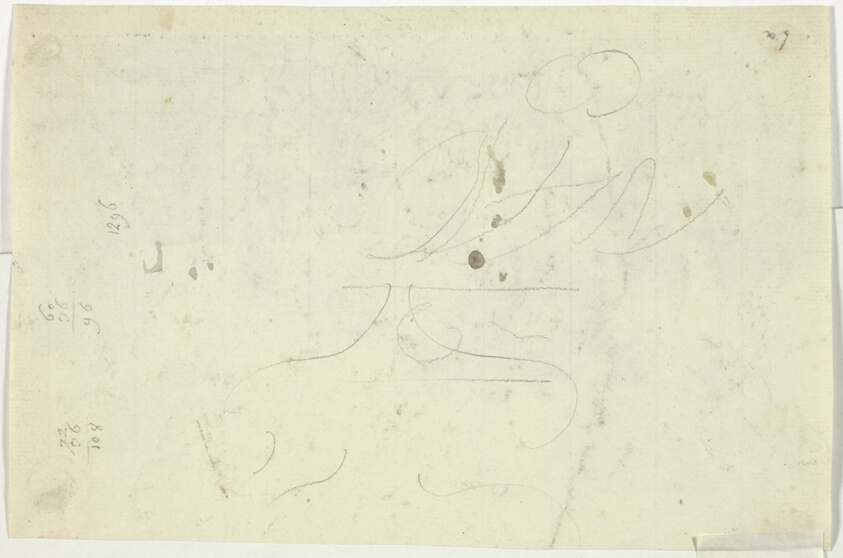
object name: Drawing and Watercolor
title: Sketch and Sums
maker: Pierre Antoine Mongin (French, 1761-1827)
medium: Black chalk on cream laid paper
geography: France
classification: drawings (visual works); prints and drawing